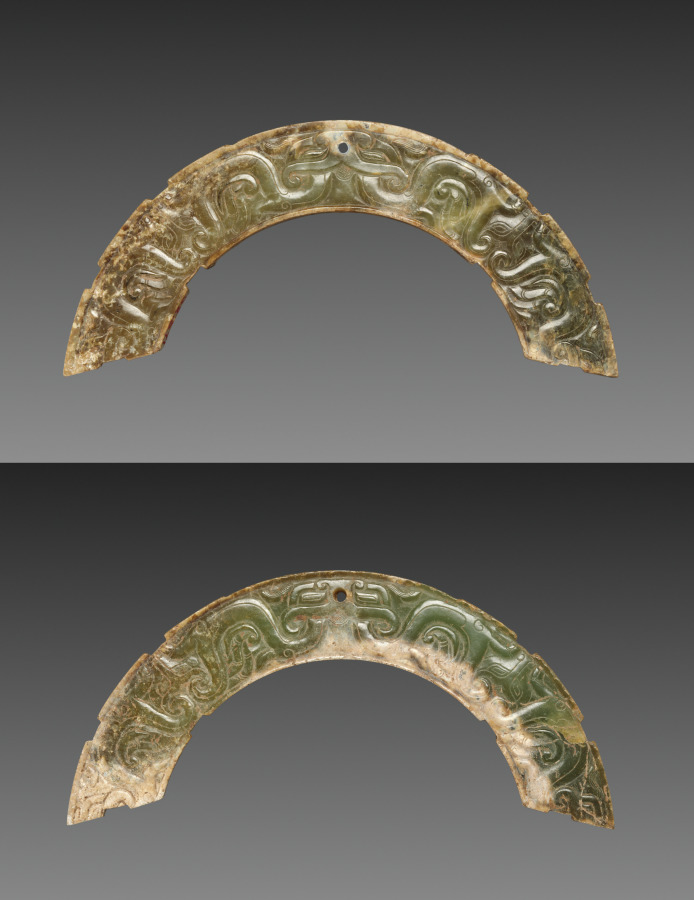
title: Pair of Arc-shaped Pendants with Animal Mask and Interlaced Animal Bands (Huang)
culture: China, Warring States period (475–221 BCE) to Western Han dynasty (206 BCE–8 CE)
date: 300–100 BCE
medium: jade (nephrite)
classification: Jade